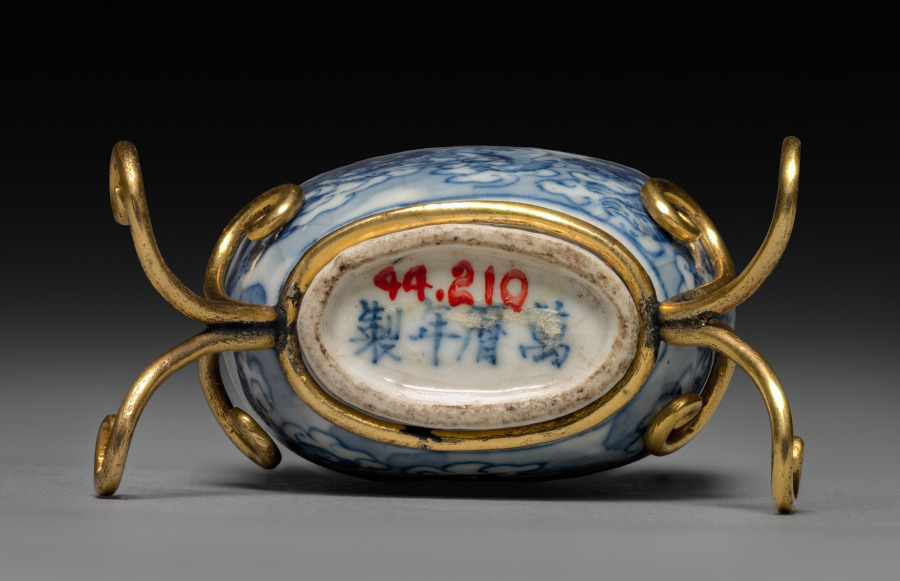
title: Flattened Ovoid Snuff Bottle with Stopper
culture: China, Jiangxi province, Jingdezhen kilns, Ming dynasty (1368-1644), Wanli reign (1572-1620)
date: 1573–1620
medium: porcelain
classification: Ceramic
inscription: 萬曆年製